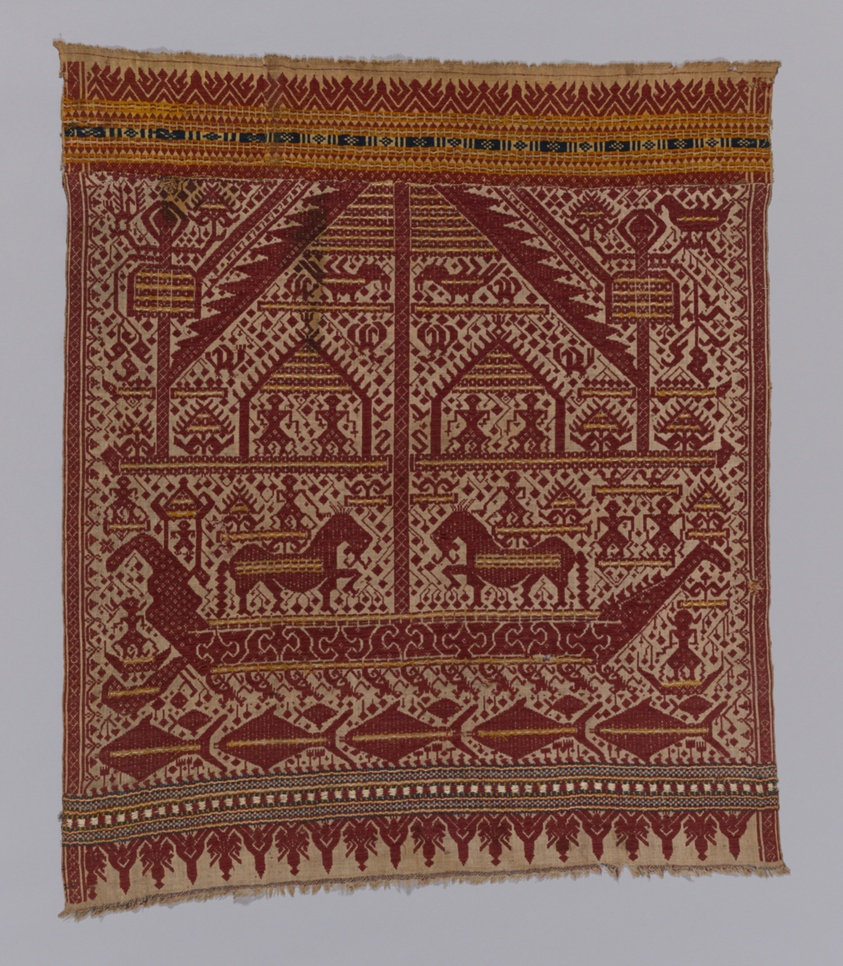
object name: Textile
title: Ritual Cloth with Prancing Horses (Tampan)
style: indonesian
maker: Paminggir (Indonesia, Sumatra, Lampung, Semangka Bay)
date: 19th century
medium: Lower portion: Cotton, silk, linen? gold-leaf-over-lacquered-paper strip wrapped silk, plain weave with supplementary patterning, and brocading wefts with supplementary two-stand weft twining C.I.E.T.A.: Toile lancé, broché Upper portion: Cotton (handspun), silk, gold-leaf-over-lacquered-paper strip wrapped ?, plain weave with supplementary patterning wefts C.I.E.T.A.: Toile lancé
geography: Indonesia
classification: weaving; textile